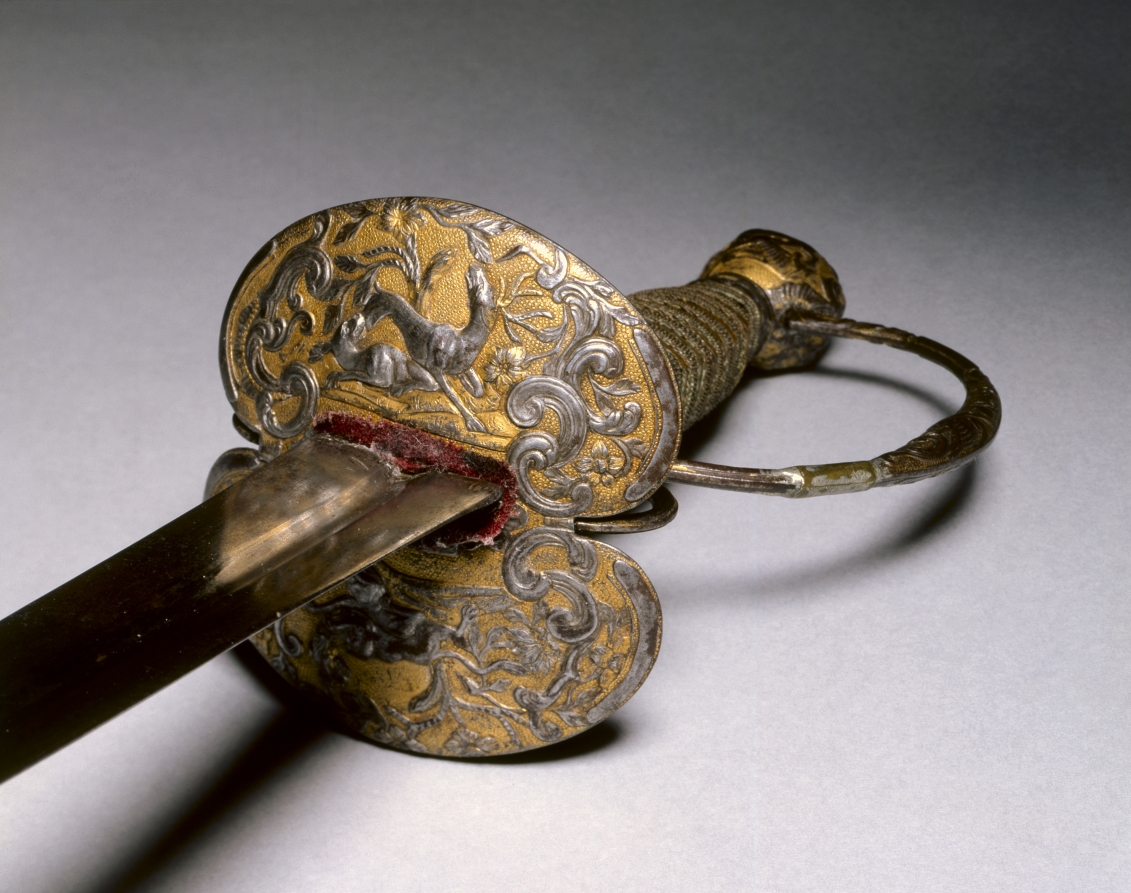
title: Small Sword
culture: France, Paris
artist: after a design by Jean-Baptiste Oudry (French, 1686–1755)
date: c.1750–60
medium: steel, gilt and russeted, copper, wood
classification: Arms and Armor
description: The hilt, pommel, and guard of this sword are richly chiseled in low relief against a stippled gold background with animals (dogs, a stag, ducks) that appear to be adapted from paintings by Jean-Baptiste Oudry (1686–1775). An elegant court sword such as this was an important accessory to a gentleman's attire, yet remained functional—it could be withdrawn for an impromptu duel.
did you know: Although fully functional, this sword was used more for show—a perfect accessory for a fashionable gentleman having his portrait painted.